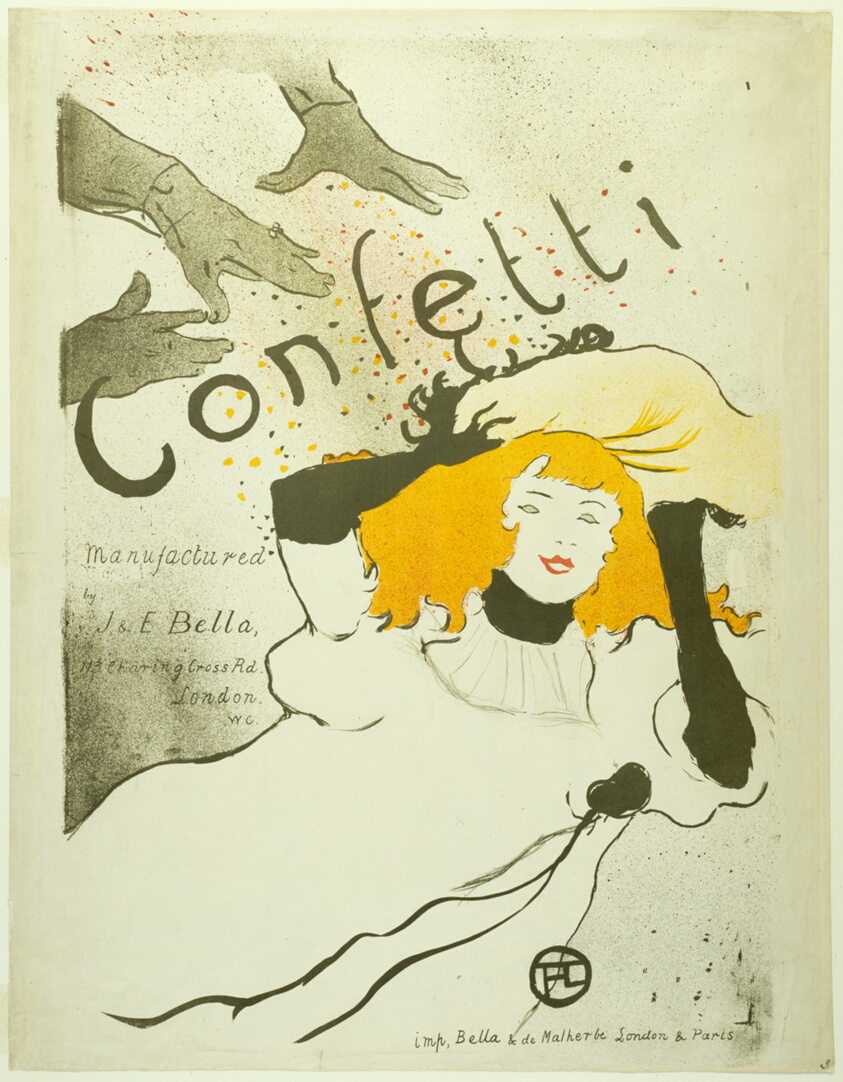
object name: Print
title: Confetti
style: Post-Impressionism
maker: Henri de Toulouse-Lautrec (French, 1864-1901)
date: 1894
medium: Color lithograph on cream wove paper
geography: France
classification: lithograph; print; prints and drawing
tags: women